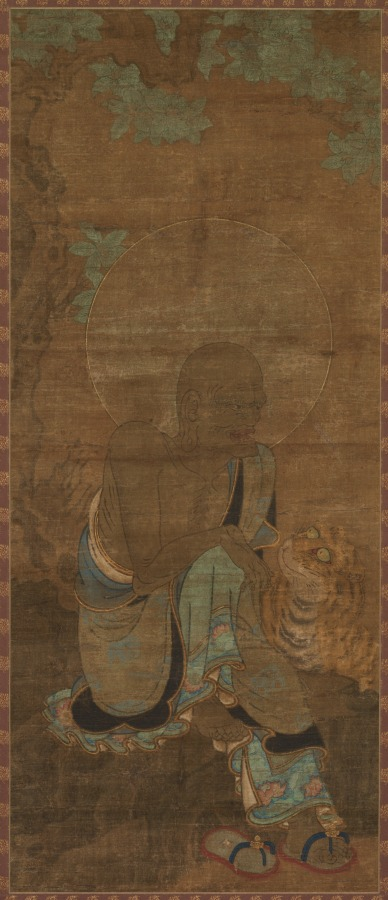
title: Rakkan (Arhat)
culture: Japan, Kamakura period (1185–1333) to Nanbokuchō period (1336–92)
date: 1300s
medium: hanging scroll; ink, color, and cut gold (kirikane) on silk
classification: Painting